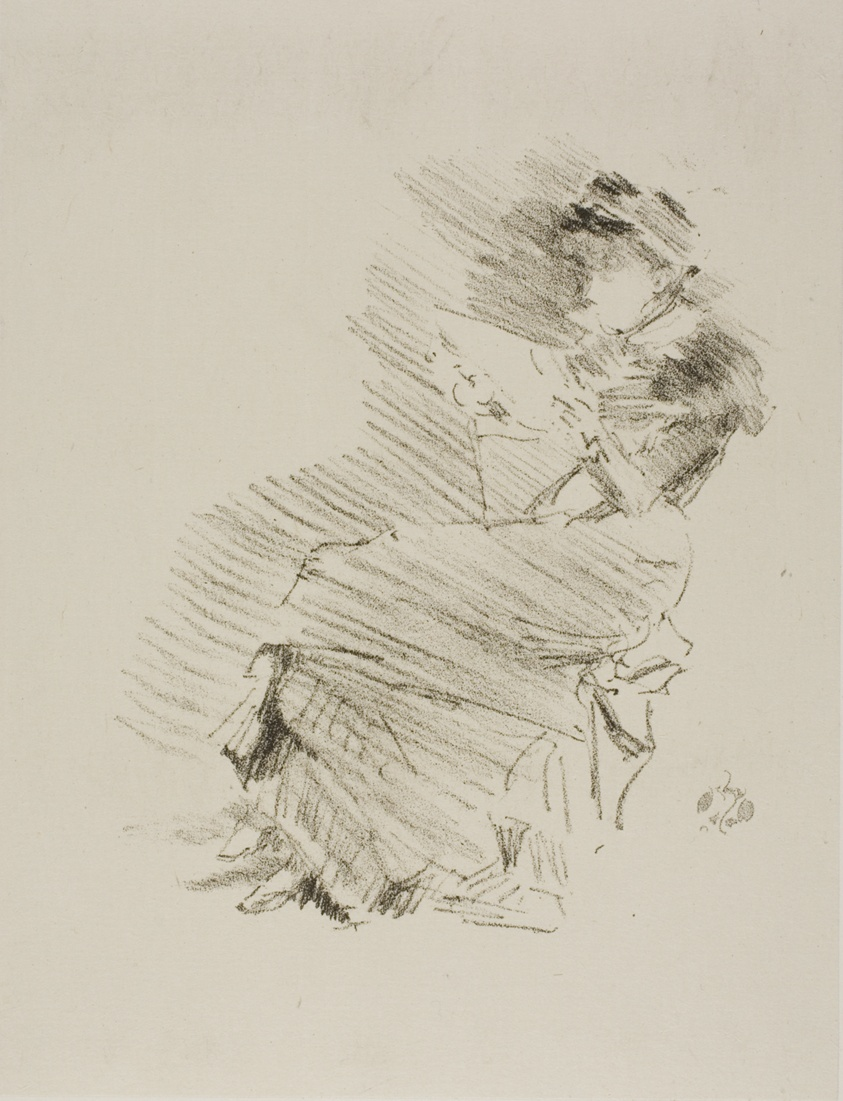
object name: Print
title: Reading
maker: James McNeill Whistler (American, 1834-1903)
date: 1879/87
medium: Lithograph, in black ink, with stumping, on cream chine, laid down on ivory plate paper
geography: United States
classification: lithograph; print; prints and drawing; paper